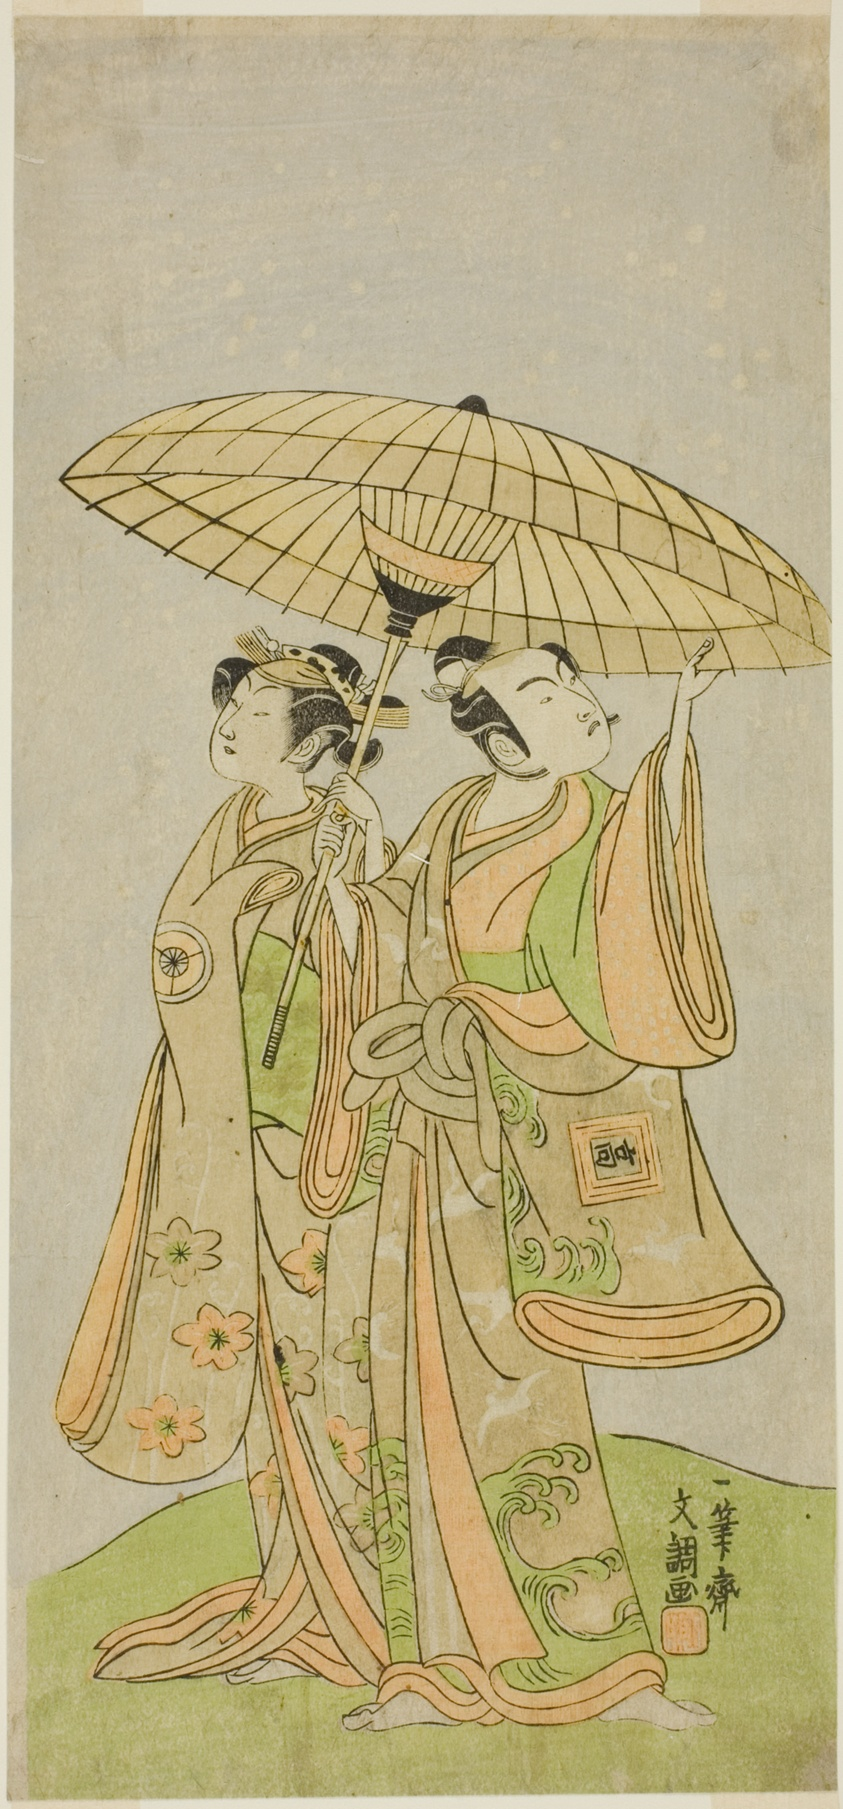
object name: Print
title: The Actors Ichikawa Komazo II as Chunagon Yukihira (right), and Iwai Hanshiro IV as Murasame (left), in the Play Kuni no Hana Ono no Itsumoji, Performed at the Nakamura Theater in the Eleventh Month, 1771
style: Japanese (culture or style)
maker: Ippitsusai Buncho (Japanese, active c. 1755-90)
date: c. 1771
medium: Color woodblock print; hosoban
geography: Japan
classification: woodblock print; print; asian art